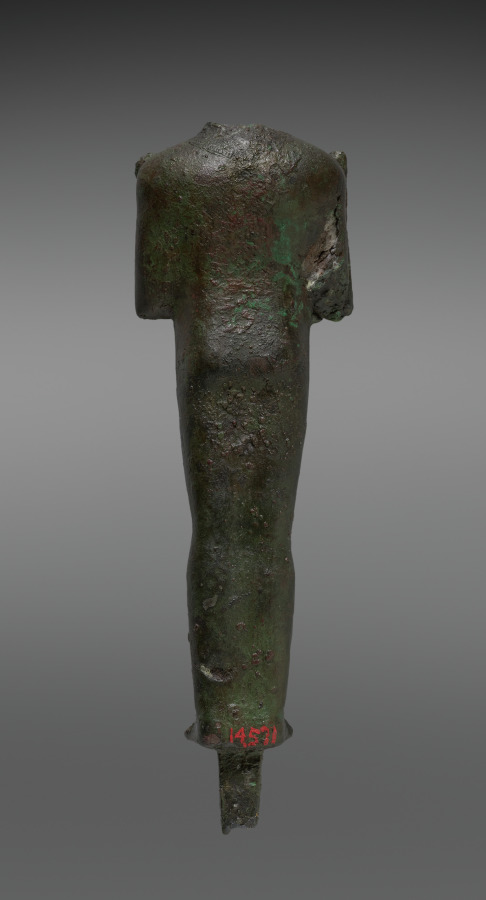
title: Statuette of Osiris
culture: Egypt, Late period (715–332 BCE), Dynasty 26 or later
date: 664–525 BCE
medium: black copper (?), hollow cast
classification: Sculpture